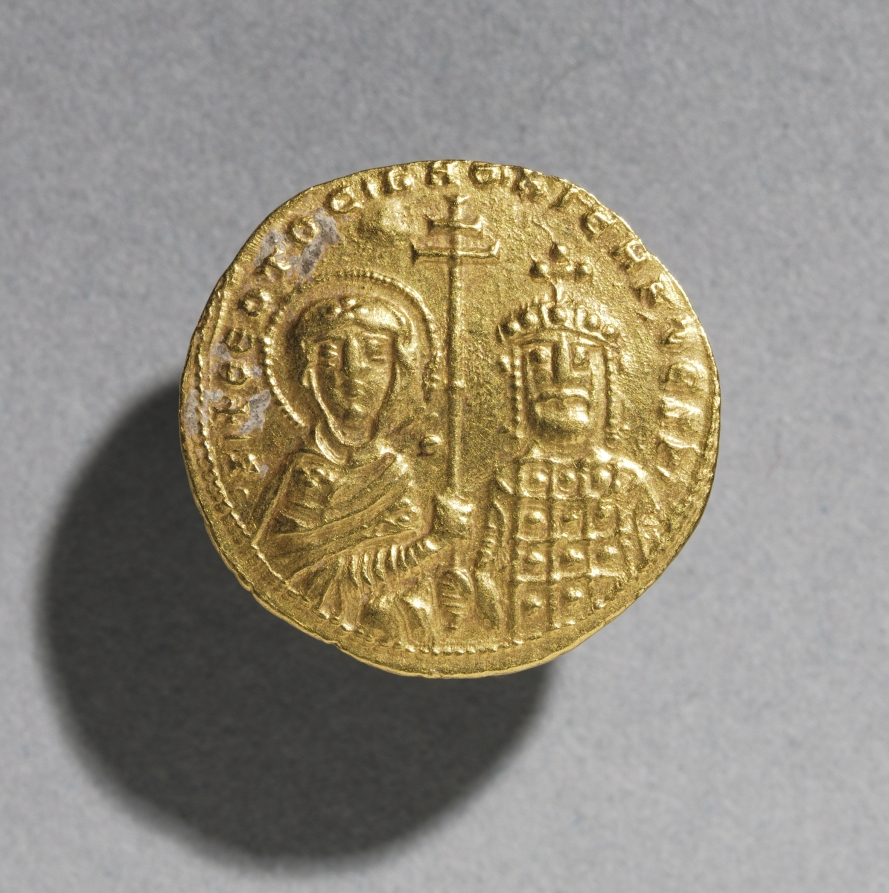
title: Nomisma with Nicephorus II Phocas (reverse)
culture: Byzantium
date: 963–969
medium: gold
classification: Coins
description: Byzantine Gold Coins The vast number of surviving Byzantine coins attests to the level of trade across the empire. Controlled and supervised by the emperor, the producers of coins took care to represent his authority and reflect his stature. Talented artists were recruited to engrave the dies (molds) used for the striking of coins. Emperors increasingly came to include their heirs and co-emperors on their coinage, as well as other family members or even earlier rulers. Coins were recognized, then as now, as small, portable works of art. With their inscriptions and images, Byzantine coins provide valuable documentation of historical events and a record of the physical appearance of the emperors. The coins shown here include the solidus, the basic gold coin of 24 karats; the tremissis, a gold coin of one-third the weight and value of the solidus; and the nomisma, which in the 10th century replaced the solidus as the standard gold coin.